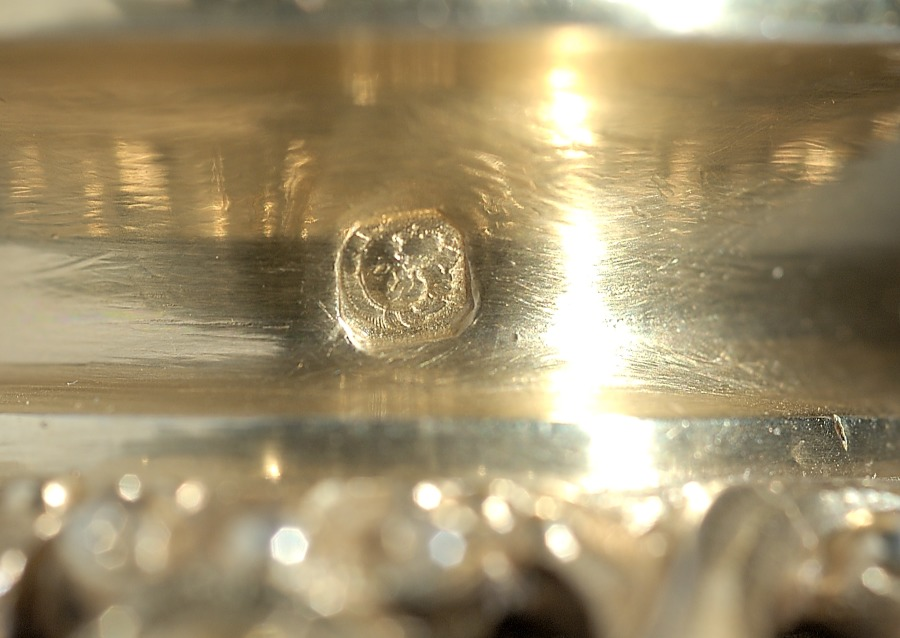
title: Centerpiece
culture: France, 19th century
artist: Charles-Nicolas Odiot (French, 1826–1868)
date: 1838–1848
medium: silver gilt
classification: Metalwork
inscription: engraved inside base: "ODIOT ORFEVRE DU ROI A PARIS"; engraved beneath crowns: "LP" (conjoined for King Louis Philippe of France).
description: Made for Louis Philippe (1773-1850), King of France 1830-48.